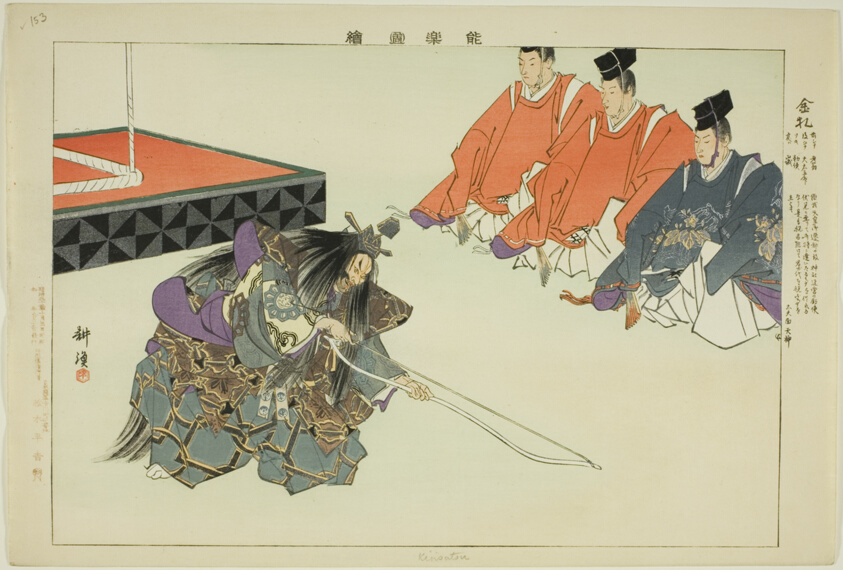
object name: Print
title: Kinsatsu, from the series "Pictures of No Performances (Nogaku Zue)"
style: Japanese (culture or style)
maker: Tsukioka Kogyo; Japanese, 1869-1927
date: 1898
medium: Color woodblock print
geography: Japan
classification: woodblock print; print; asian art